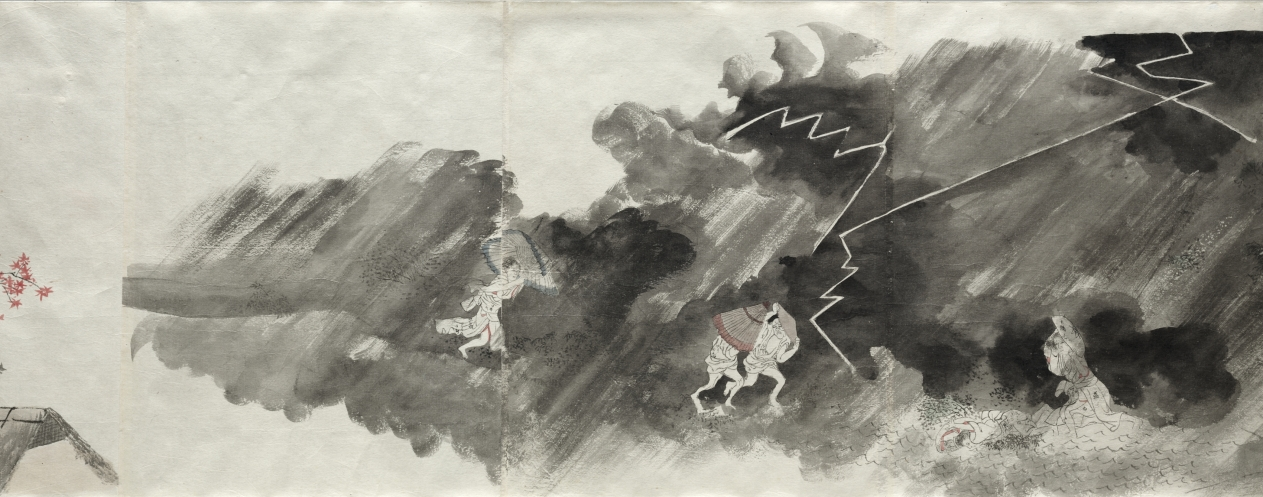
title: Sketch Copy of Natural Disasters, from the Seven Fortunes and Misfortunes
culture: Japan, Edo period (1615–1868) to Meiji period (1868–1912)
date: after 1773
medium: handscroll; ink and color on paper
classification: Painting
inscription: Signed: Gettcho; dated 1773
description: This unmounted handscroll is a copy of the first of a three-scroll set painted by Maruyama Ōkyo (1733–1795) for Buddhist monk Yujō (1723–1773). It depicts people's unfortunate encounters with forces of nature from wind to beasts. Ōkyo's realistic, contemporary imagery was meant to evoke a sense of recognition and empathy in viewers, shocking them into avoidance of possible punishments.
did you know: Notations that appear throughout the scroll indicate colors and other details of the original painting.